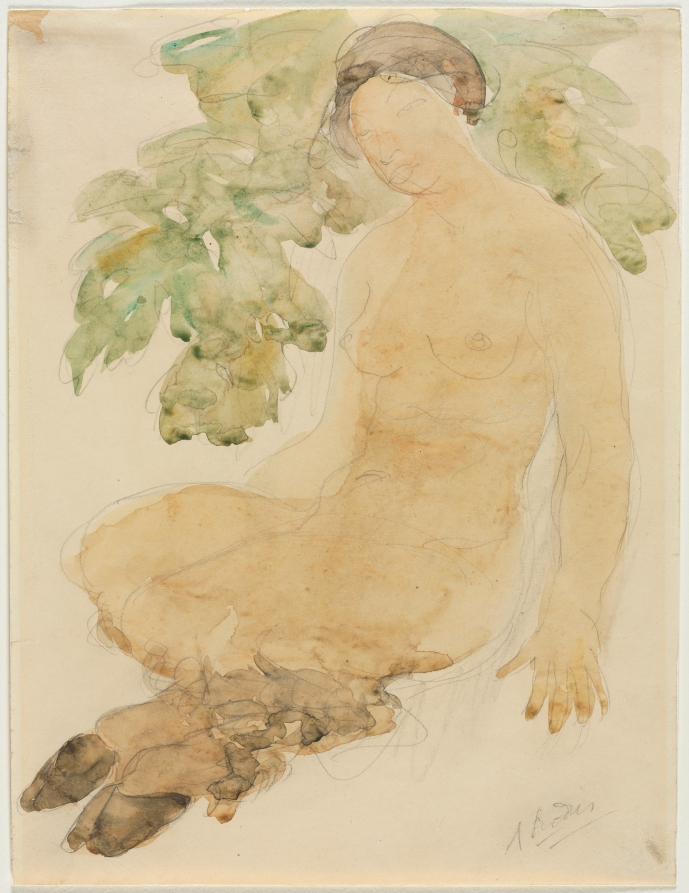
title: Faunesse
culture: France, late 19th-early 20th Century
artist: Auguste Rodin (French, 1840–1917)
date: c. 1905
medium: watercolor over graphite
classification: Drawing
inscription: signed, lower right, in graphite: A. Rodin [twice underlined] ; VERSO, lower left, in graphite [?]: 26 [underlined]